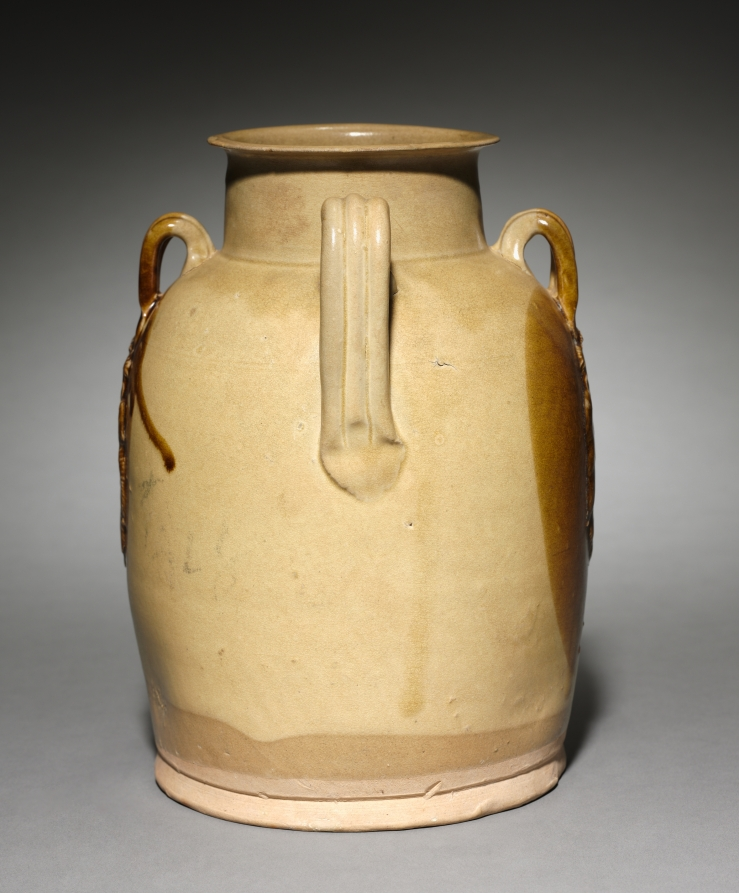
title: Ewer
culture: China, Hunan province, Tongguan, Tang dynasty (618–907)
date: 800s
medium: glazed stoneware with molded and applied decoration, Changsha ware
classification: Ceramic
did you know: Molded clay medallions with a stylized double-bird-and-leaf pattern were applied below the two side loops and the spout.